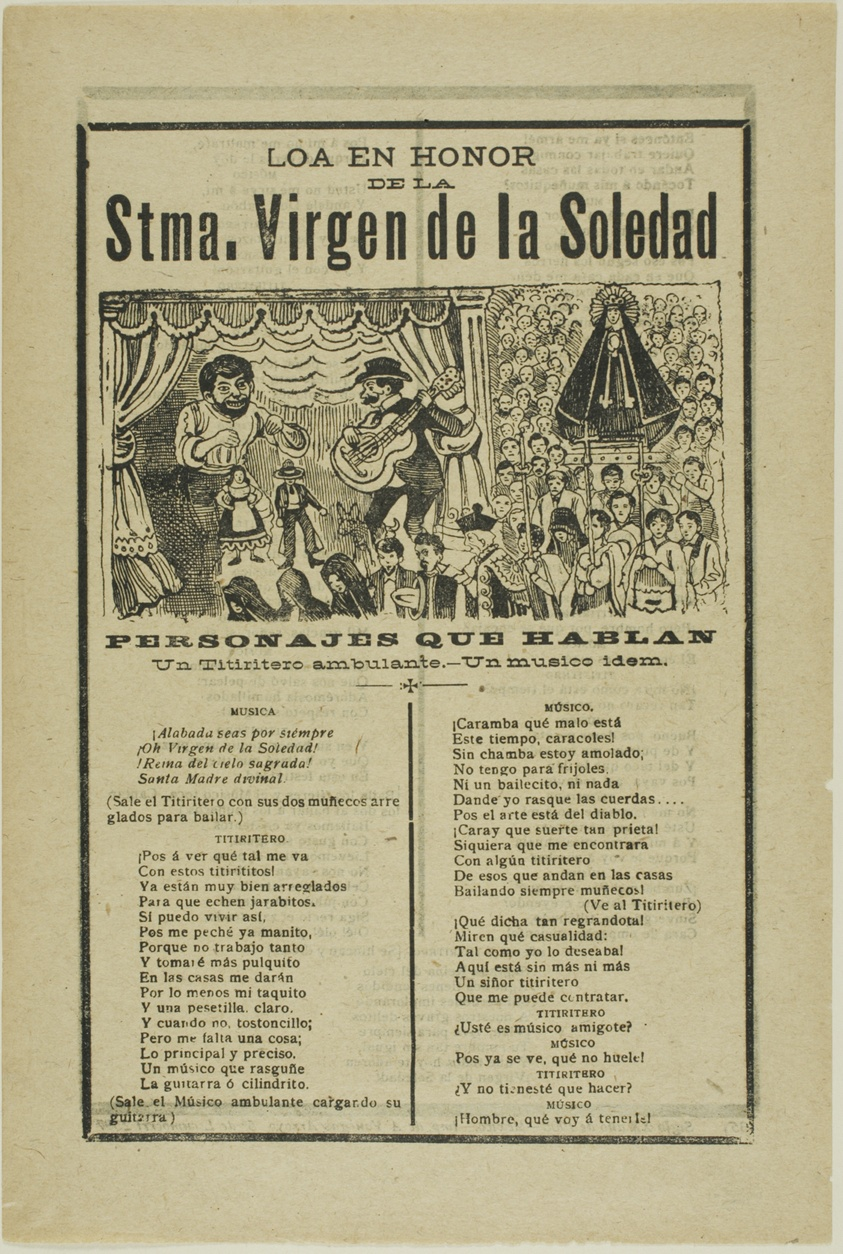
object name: Print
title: Most Holy Virgin of Solitude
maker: José Guadalupe Posada (Mexican, 1852-1913)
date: published 1903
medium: Double-sided relief engraving on zinc on paper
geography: Mexico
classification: relief etching; print; prints and drawing